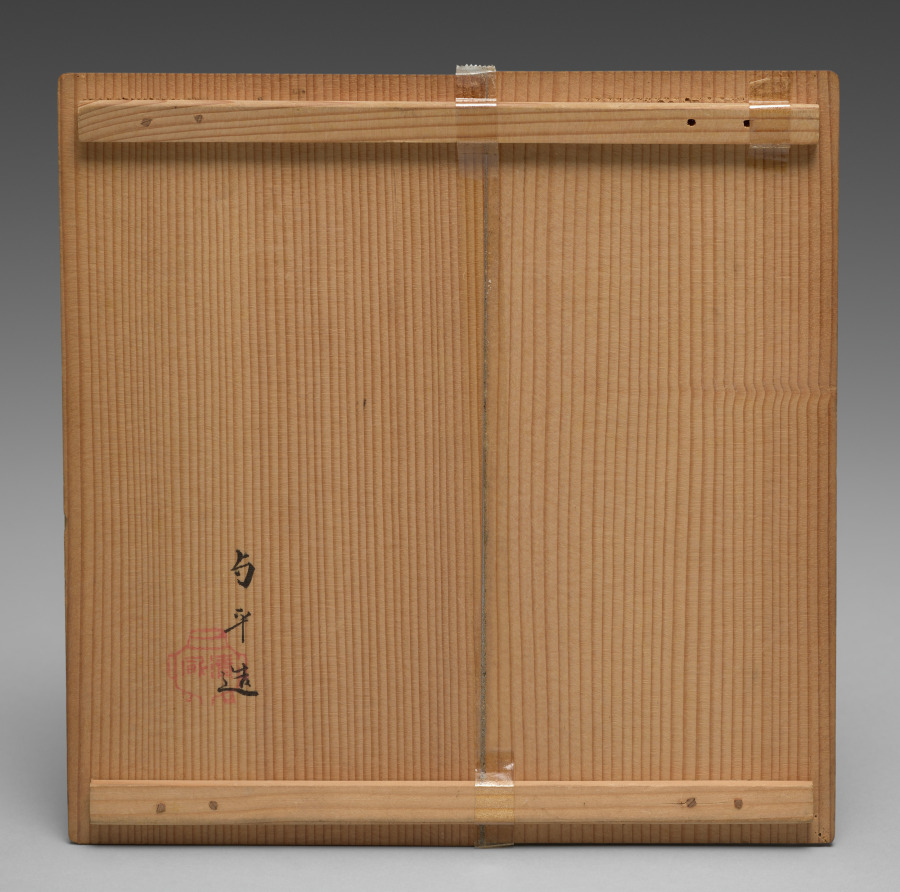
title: Dining Set with Plum Blossoms and Cracked-Ice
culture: Japan, Edo period (1615–1868) to Meiji period (1868–1912)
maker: Seifū Yohei II (Japanese, 1844–1878)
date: 1875–78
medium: Porcelain with molded designs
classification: Ceramic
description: Each item in this set has a delicate low-relief design of flowering plum branches over scattered, intersecting lines meant to resemble the cracked-ice surface of a frozen body of water and is signed on the base in gold pigment. While Yohei II produced many fine works in underglaze blue, like those produced by Kiyomizu Shichibei, he also made works in quite different styles later in his career, from the early 1870 s. In 1873, he was appointed purveyor to the Industrial Center of Kyoto Prefecture, a designation associated with Kyoto’s efforts to reach an international market through the port of Kobe; and from 1875 until his death, he was involved in national-level projects to present Japanese ceramics across the world. It was during this period that Yohei III was apprenticed to Yohei II, and it has been suggested that this set may in fact be an early example of Yohei III’s work, which he signed with his teacher’s name. Decorated with flowers resembling Japanese textile motifs, the set calls to mind the design of Yohei II’s pair of vases with plum blossoms in the Victoria and Albert Museum. Here, the elaborate trees created for a formal public exhibition setting have been translated into the approachable blossoms of the genteel domestic environment. While the designs are consistent across the pieces, each raised flower petal and pistil and each incised line in the ice was done by hand, so the cups, bowls, and dishes are similar yet unique. The bottoms of two boxes once identified the set’s owner, but the information has been deliberately obscured with black ink. However, inscriptions still visible appear to indicate two occasions, once at the end of July 1886 , and once again in June 1916 , when parts of the set were requested from Hokura in Niigata Prefecture. The location corresponds to a neighborhood in the present-day city of Jōetsu. The surname Tsuji 辻 also appears on a paper tag affixed to one of the box cloths. Future research may possibly reveal more about their provenance. A vase by Yohei III in a private collection combines the formal grandeur of the Yohei II vases in the Victoria and Albert Museum with the gentler design of this dining set, placing flowering plum trees against soft, scalloped-edge clouds resembling those in golden screens.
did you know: The dining wares have a creamy white coloration that the four boxes containing them identify as Korean in style.